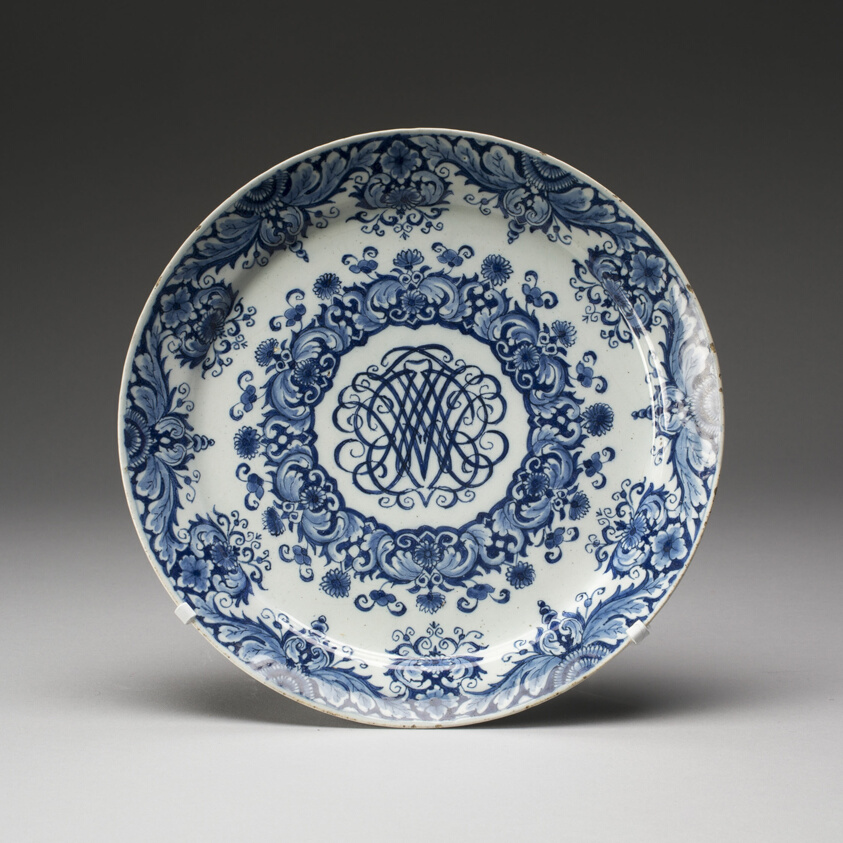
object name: Ceramics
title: Plate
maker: De Grieksche A (The Greek A) Factory; Delft, Netherlands, 1658-1811; Pieter Adriaensz. Kocks; Dutch, active 1701-1722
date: 1703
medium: Tin-glazed earthenware (Delftware)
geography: Delft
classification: plate (general, dish); dish (vessel); earthenware; tin-glazed ware; ceramics; european decorative arts